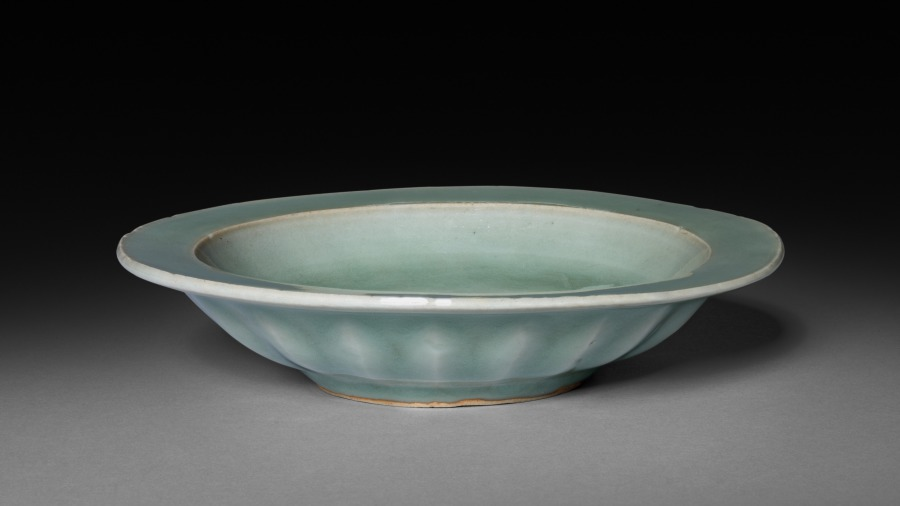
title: Dish with Two Fish in Relief: Longquan Ware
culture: China, Zhejiang province, Yuan dynasty (1271-1368)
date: early 14th Century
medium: glazed porcelain with unglazed molded decoration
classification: Ceramic